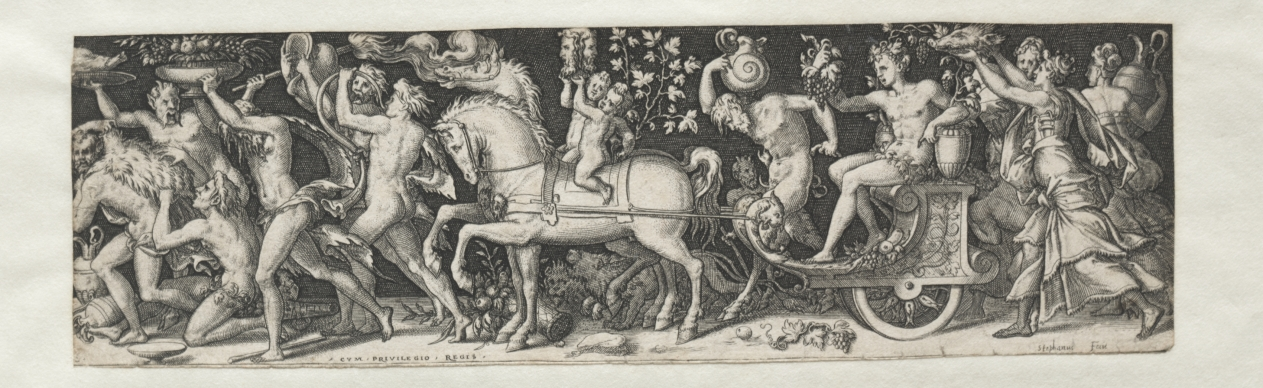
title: Combats and Triumphs No. 5: The Triumph of Bacchus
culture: France, 16th century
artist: Etienne Delaune (French, 1518/19-c. 1583)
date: c. 1550–72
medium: engraving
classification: Print